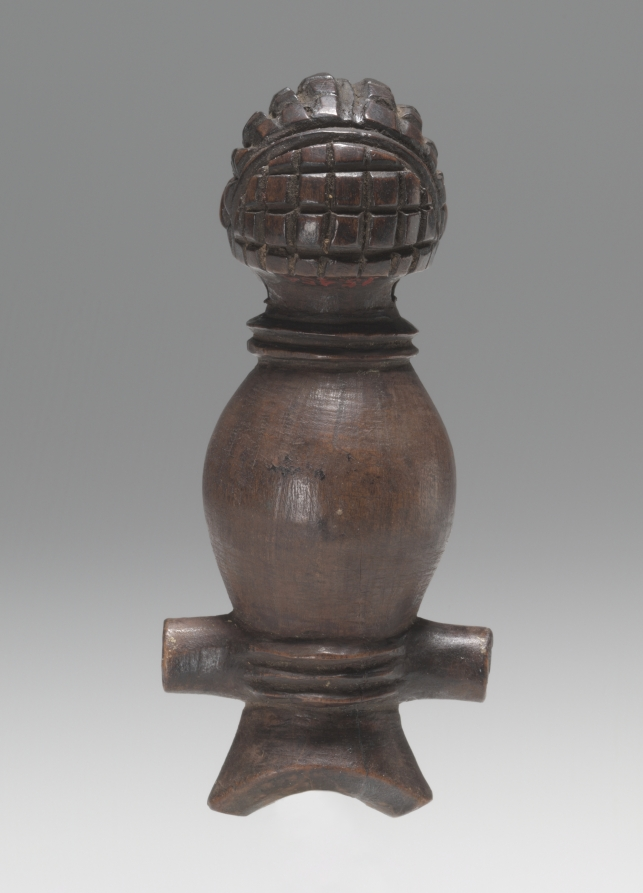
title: Whistle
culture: Central Africa, Democratic Republic of Congo or Angola, Chokwe people, late 19th century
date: late 1800s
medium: Wood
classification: Musical Instrument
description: Carved out of ivory or wood in a variety of shapes, Chokwe whistles often bear miniature, stylized renderings of masks. Cikunza, the "patron saint" of the boys' initiation into manhood, is depicted with a pointed extension imitating the horn of a road antelope, symbolizing the fertility spirit. Typically such whistles were used by men during the hunt to communicate with their co-hunters and to call their dogs. They were either worn attached to a string as a necklace or tied to a spear.